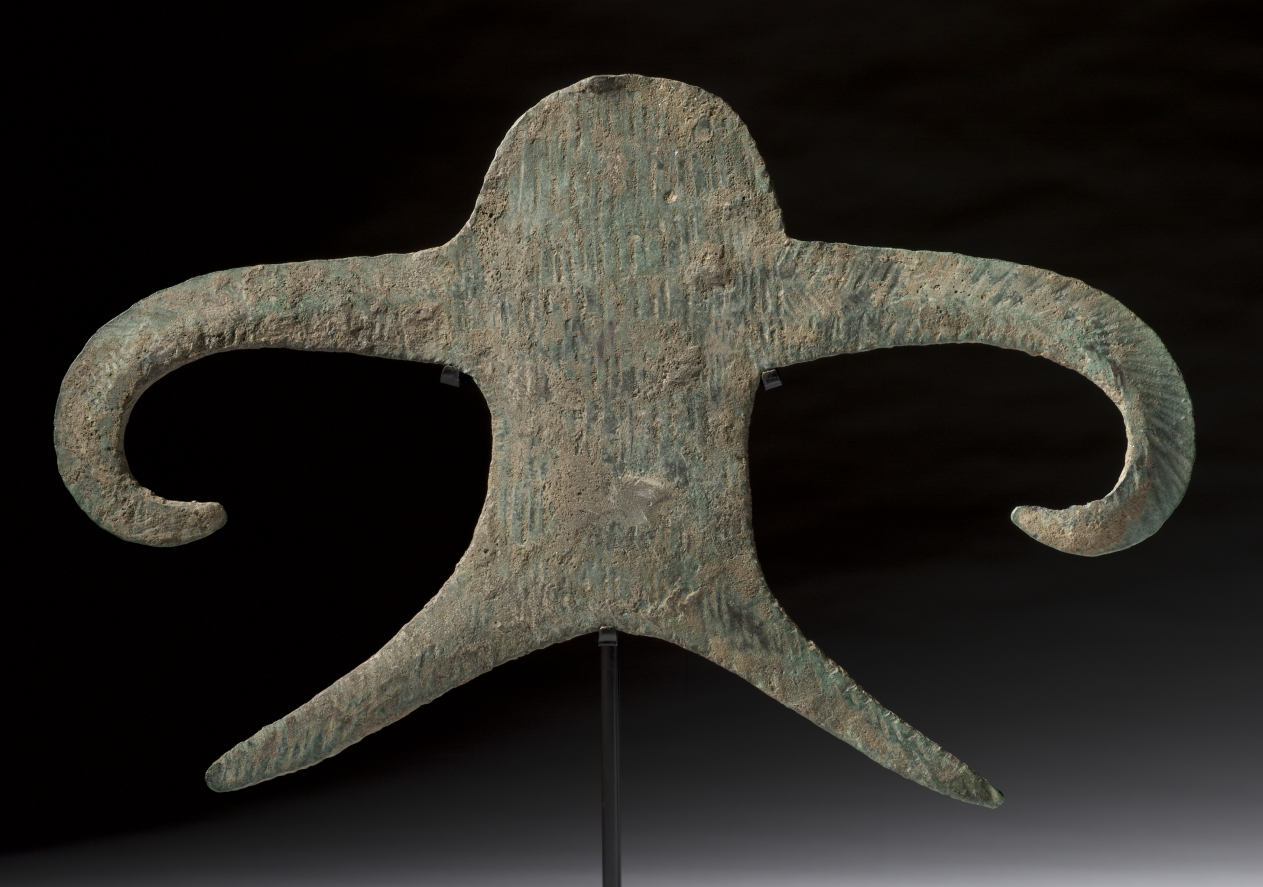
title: Anthropomorph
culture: India, Bronze Age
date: c. 1500–1000 BCE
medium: copper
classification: Sculpture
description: Among the few works of art known from the first millennium BC in India, anthropomorphs such as this fine example have an abstract formal appeal, but their meaning and function remain mysterious. They were made during the approximately 1,500-year long period of time between the protohistoric Indus Valley civilization, which flourished between about 2,800–1,800 BC, and the Maurya period (322–187 BC), when works of art must have been made in perishable materials that no longer survive.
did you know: Most of these mysterious objects were discovered in the plain regions of the Ganges and Yamuna Rivers of northern India.